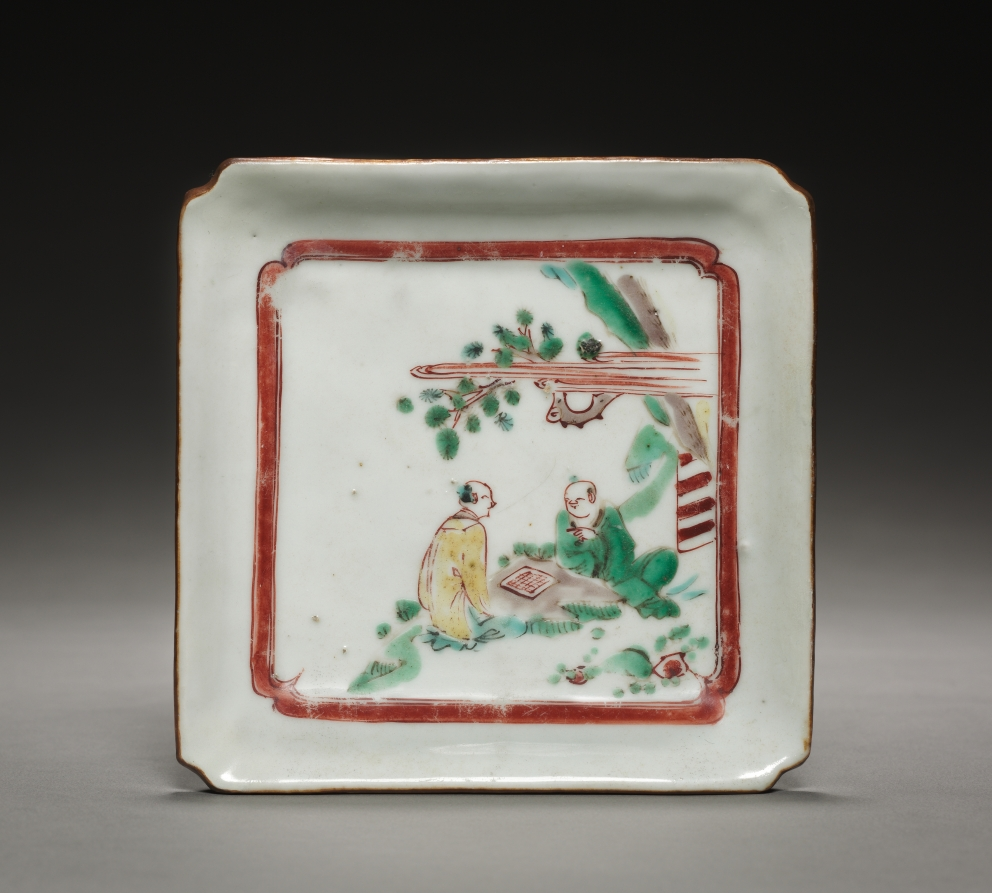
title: Dish with Two Men Playing Go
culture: Japan, Edo period (1615–1868)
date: 1700s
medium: porcelain, molded, with overglaze color enamel (Hizen ware, Imari style)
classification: Ceramic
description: This modest serving dish is decorated with two figures playing chess, or go in Japanese. The green color is typical of kutani porcelain. This dish was produced for the export market after Japan replaced China as Europe’s primary source for export porcelain.